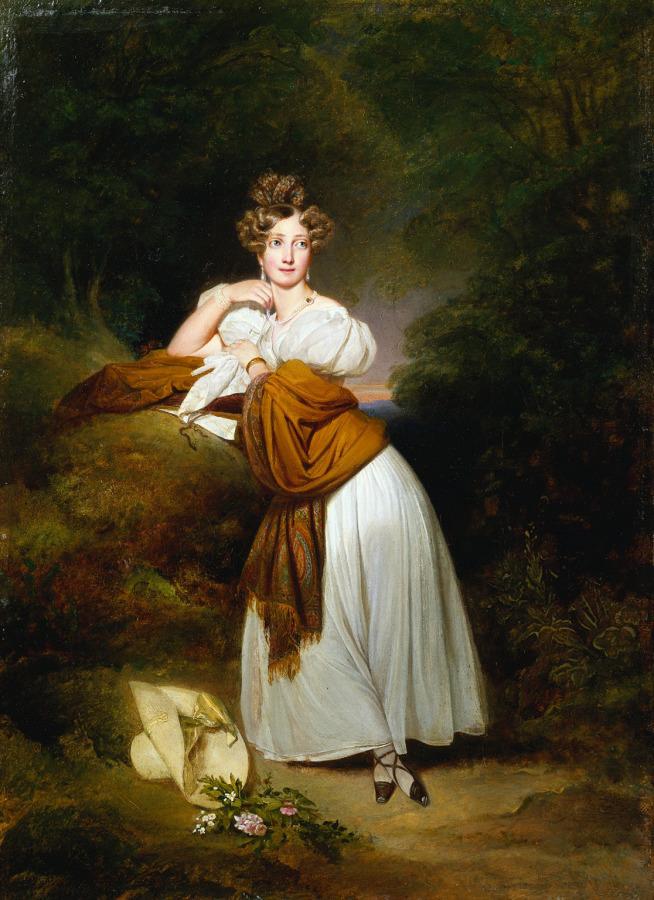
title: Sophie Guillemette, Grand Duchess of Baden (1801-1865)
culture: Germany, 19th century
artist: Franz Xaver Winterhalter (German, 1805–1873)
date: 1831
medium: oil on fabric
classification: Painting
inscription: Signed lower left: Fr. Winterhalter f 1831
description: Sophie Guillemette (1801-1865), daughter of Gustavus IV Adolphus of Sweden, was the wife of Grand Duke Leopold of Baden. Winterhalter was her drawing instructor and made several portraits of both the duke and the duchess before leaving for London to become the most celebrated portrait painter of his time.